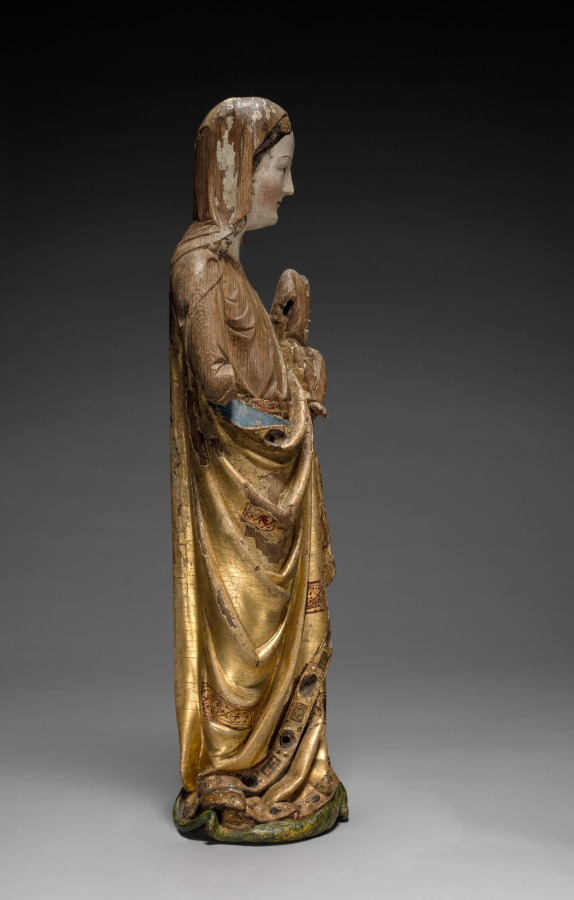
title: Virgin and Child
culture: Mosan (Valley of the Meuse), Liège(?), late 13th century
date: late 1200s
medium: wood (oak) with polychromy and gilding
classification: Sculpture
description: This sculpture is a rare survival in wood from the valley of the Meuse River (modern Belgium and Holland), an important region for the production of ecclesiastical art in the 1100s and 1200s. The elegantly draped figure is remarkable for the preservation of much of its original paint and gilding, including the Virgin's gilded mantle highlighted with decorative bands of geometric patterns and the green dragon on which she stands. There are small settings around the Virgin's neck and along the border of the mantle that would have originally been set with gem and glass cabochons in imitation of the richly adorned metalwork for which Mosan art was highly esteemed. The settings for these cabochons provide some hint of the original opulence of this sculpture. The Virgin's serene features and beautiful countenance are noteworthy, as is the refined execution of the draperies.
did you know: Dragons, like the one Mary is standing on, sometimes look more like snakes in medieval art.